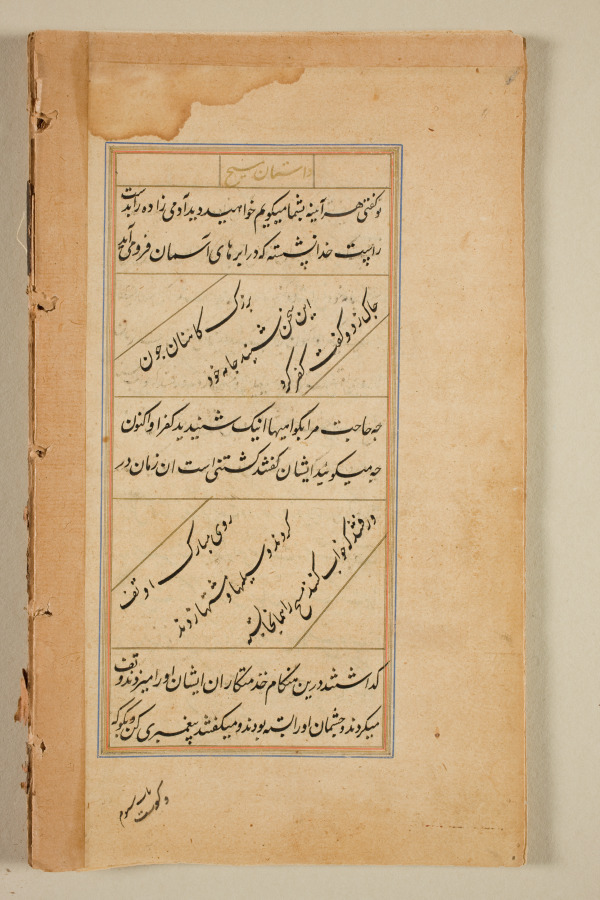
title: Text page from a Mirror of Holiness (Mir’at al-quds) of Father Jerome Xavier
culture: Mughal India, Allahabad, made for Prince Salim (1569–1627)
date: 1602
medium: Ink and gold on paper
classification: Manuscript